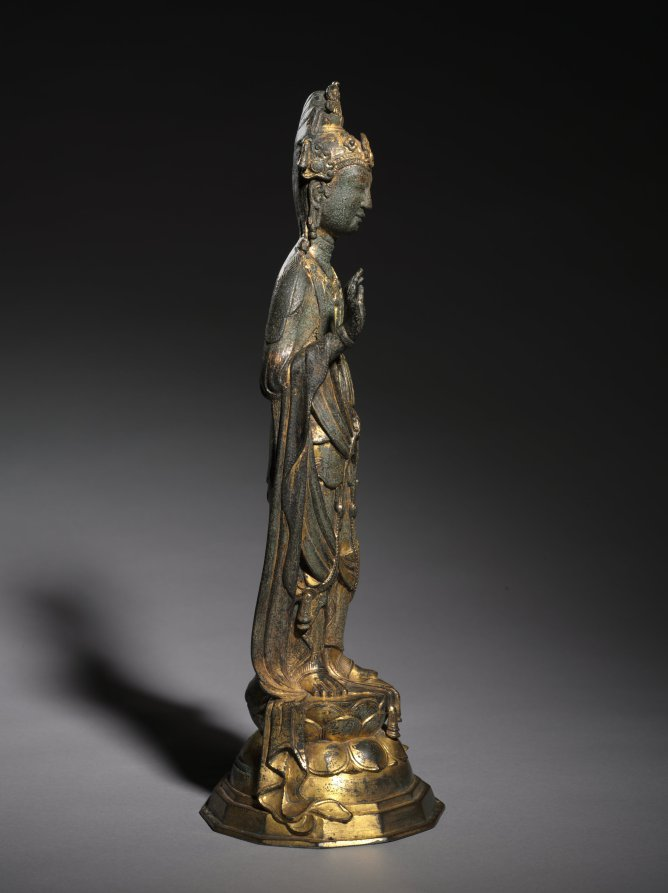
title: Bodhisattva Guanyin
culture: China, Liao dynasty (916-1125)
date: 900s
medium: gilt bronze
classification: Sculpture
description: In Buddhism, a bodhisattva is a being who, just before reaching enlightenment, turns back to assist others to reach enlightenment first. This bodhisattva holds his hand palm forward, in a gesture that tells followers not to fear. In his other hand he carries a bottle that holds the elixir of immortality.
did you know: The Liao rulers were devout Buddhists who commissioned substantial religious projects.